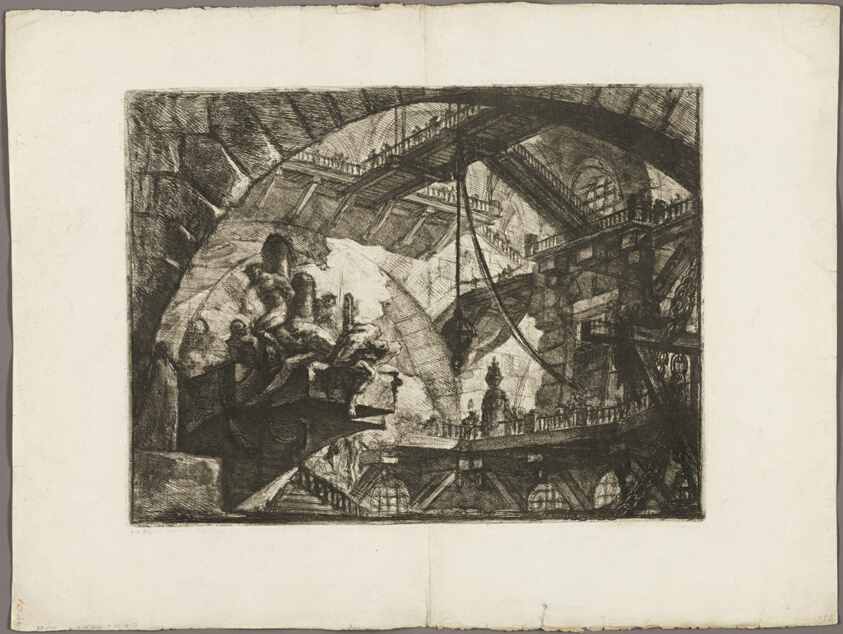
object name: Print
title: Prisoners on a Projecting Platform, plate 10 from Imaginary Prisons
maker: Giovanni Battista Piranesi (Italian, 1720-1778)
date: 1761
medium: Etching and engraving on heavy ivory laid paper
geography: Italy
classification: etching; print; prints and drawing